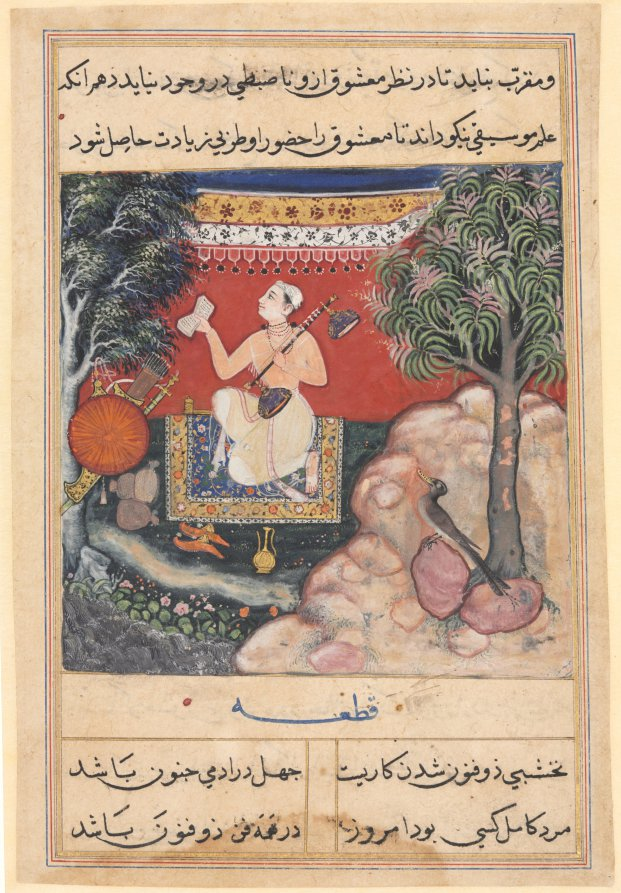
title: The origin of music from a fabulous bird of India which had seven holes in its beak, from a Tuti-nama (Tales of a Parrot): Fourteenth Night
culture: Mughal India, court of Akbar (reigned 1556–1605)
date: c. 1560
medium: gum tempera, ink, and gold on paper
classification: Painting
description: This story tells of a fantastical bird called a qaqnos who emitted sonorous tones from its beak when joyful. From these sounds, the science of music was developed. In the image, a man holding a book in one hand and an instrument called a vina in the other crouches beneath a tasseled canopy. His weapons, a quiver, sword, and shield hang in the tree nearby.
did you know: The illegible writing on the musician’s book seems derived from an Indian script, rather than Arabic or Persian.